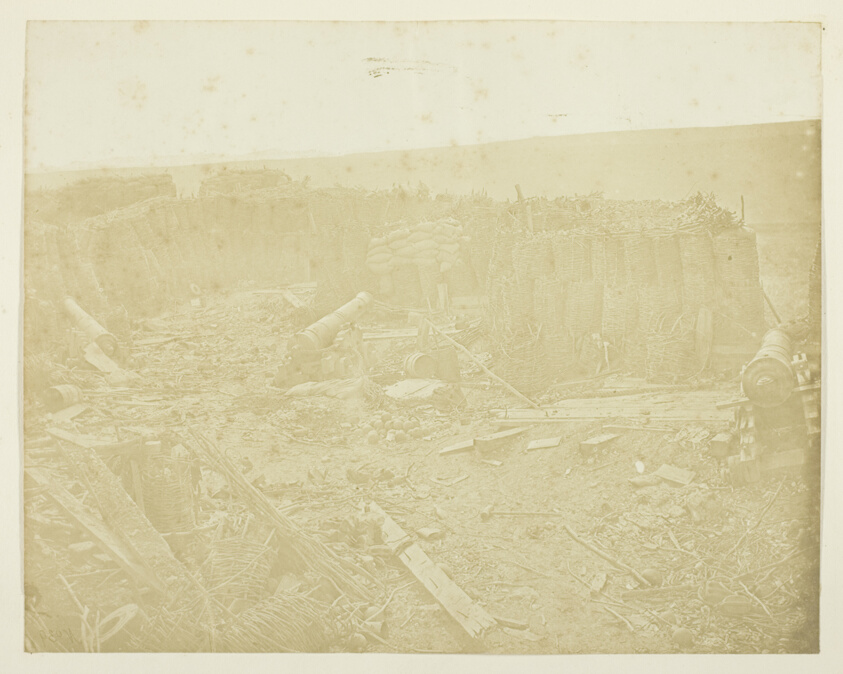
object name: Photograph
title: Battery in the Malakoff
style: 19th century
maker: James Robertson (Scottish, c. 1813–d. after 1881)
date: 1855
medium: Albumen print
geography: Scotland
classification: unidentified; photography; photograph